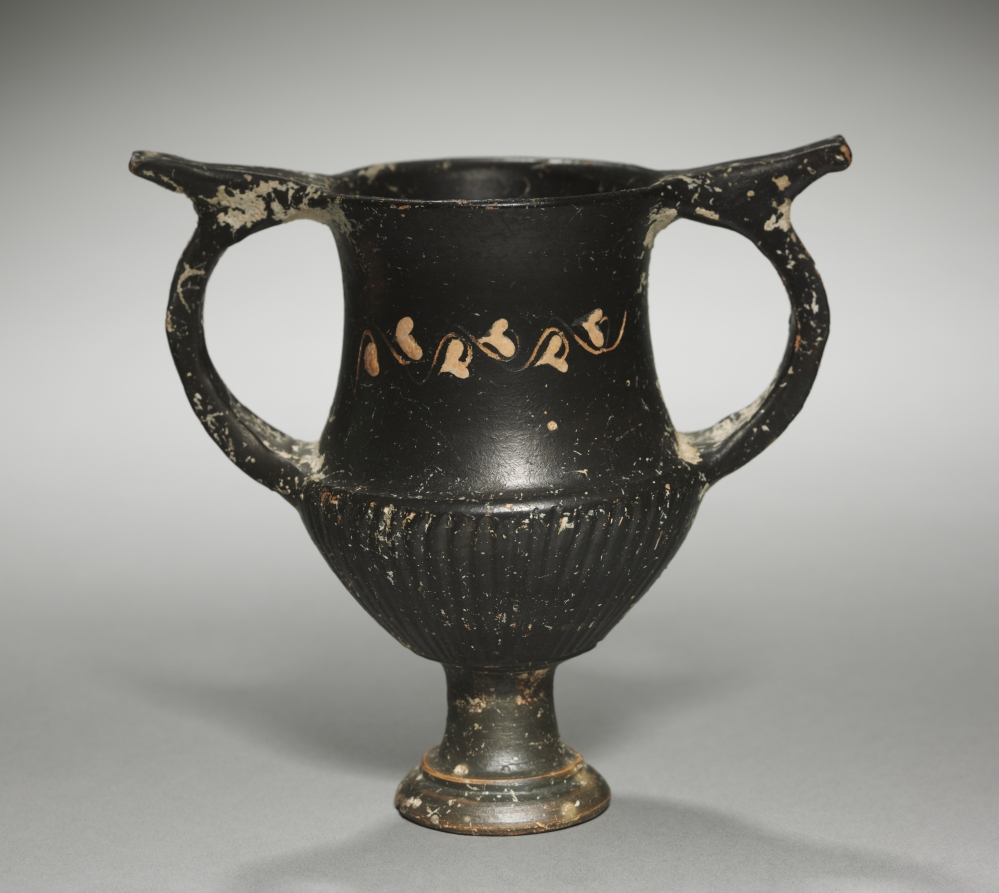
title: Black-Gloss Kantharos (Drinking Cup)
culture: Greek, Attic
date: c. 300–275 BCE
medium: ceramic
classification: Ceramic